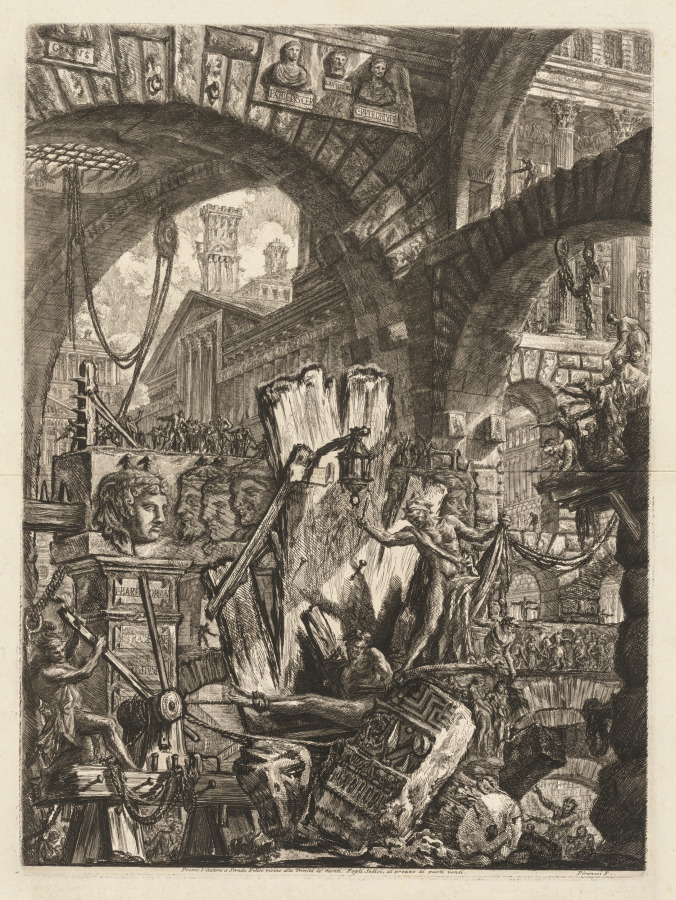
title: The Prisons: An Architectural Medly, with a Man on the Rock in the Foreground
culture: Italy, 18th century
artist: Giovanni Battista Piranesi (Italian, 1720–1778)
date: 1745–50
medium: etching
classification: Print